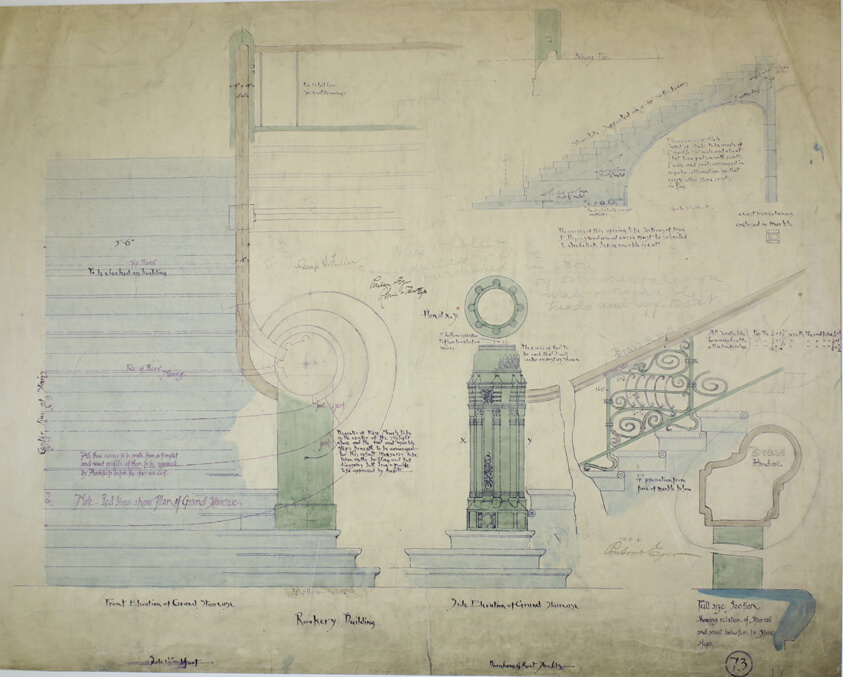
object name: Architectural Drawing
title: Rookery Building, Chicago, Illinois, Details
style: 19th century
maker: Burnham & Root (American, 1873-1891); Designer: John W. Root (American, 1850-1891)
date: 1887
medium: Multicolored hectograph prints on heavy paper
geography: LaSalle Street, 209 South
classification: architectural drawing; architecture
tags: buildings, architecture, drawing, illinois, Chicago